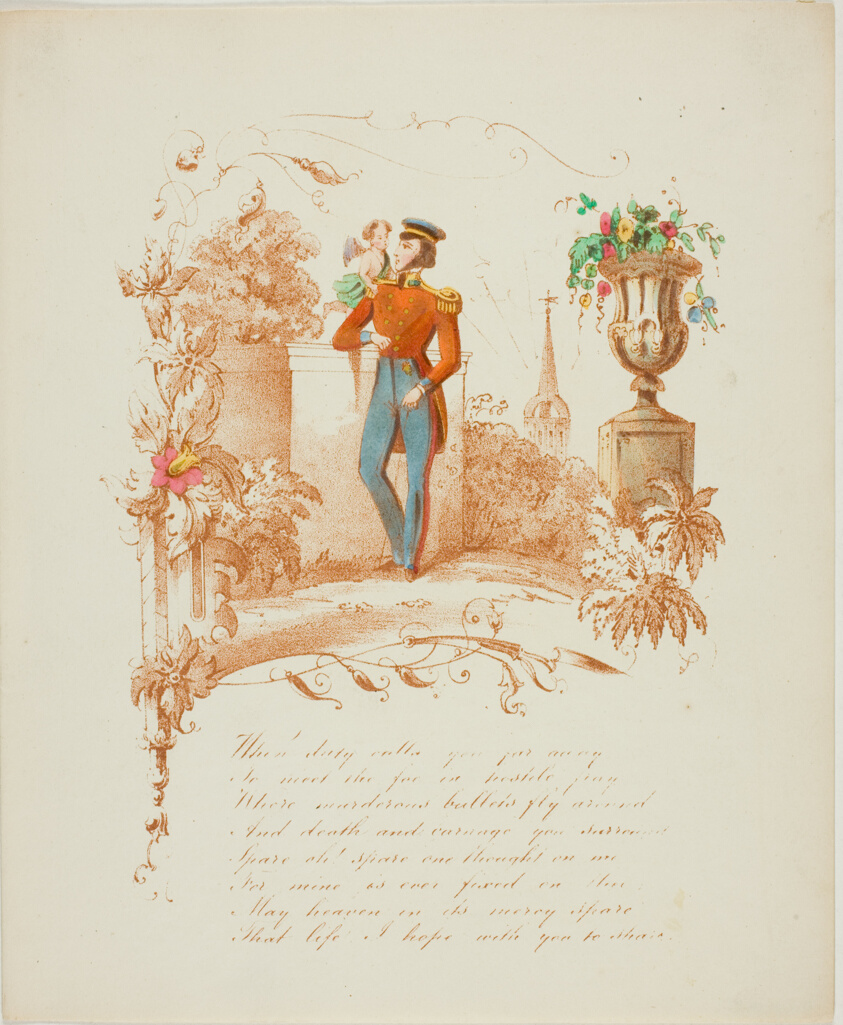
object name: Print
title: When Duty Calls You Far Away (valentine)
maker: Unknown Artist; English, 19th century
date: c. 1842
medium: Lithograph in brown ink with hand-coloring on ivory wove paper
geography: England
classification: valentine; prints and drawing; print